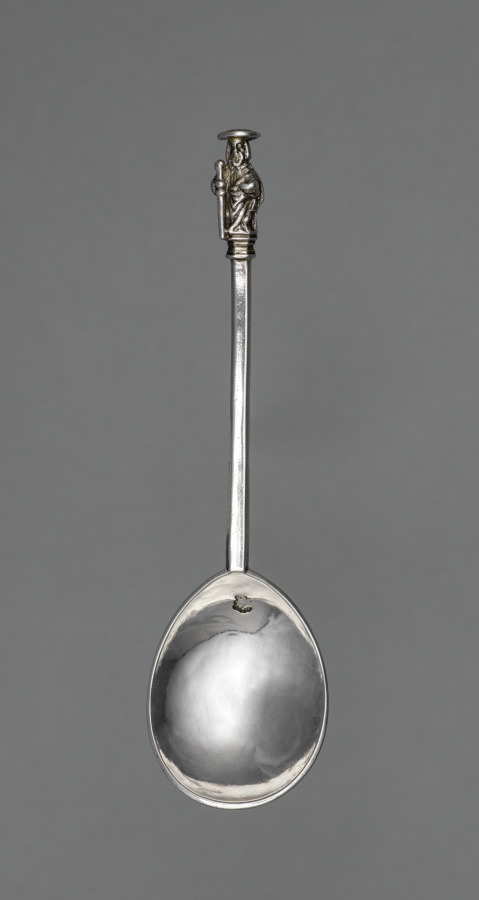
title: Apostle Spoon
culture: England, London, 17th century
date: 1622–1623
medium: silver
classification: Silver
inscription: "RH" on back of bowl.